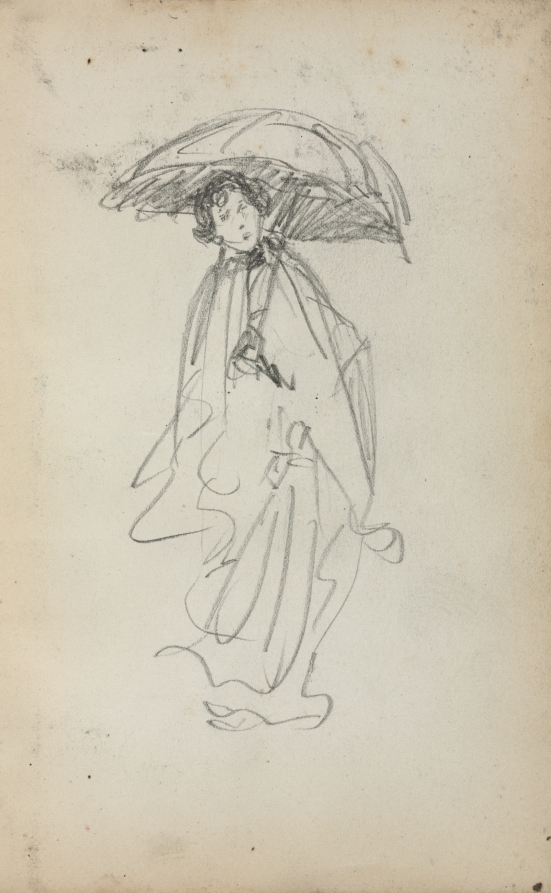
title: Italian Sketchbook: Standing Woman with Parasol (page 259)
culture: America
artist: Maurice Prendergast (American, born Newfoundland [now Canada], 1858–1924)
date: 1898–1899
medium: pencil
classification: Bound Volume